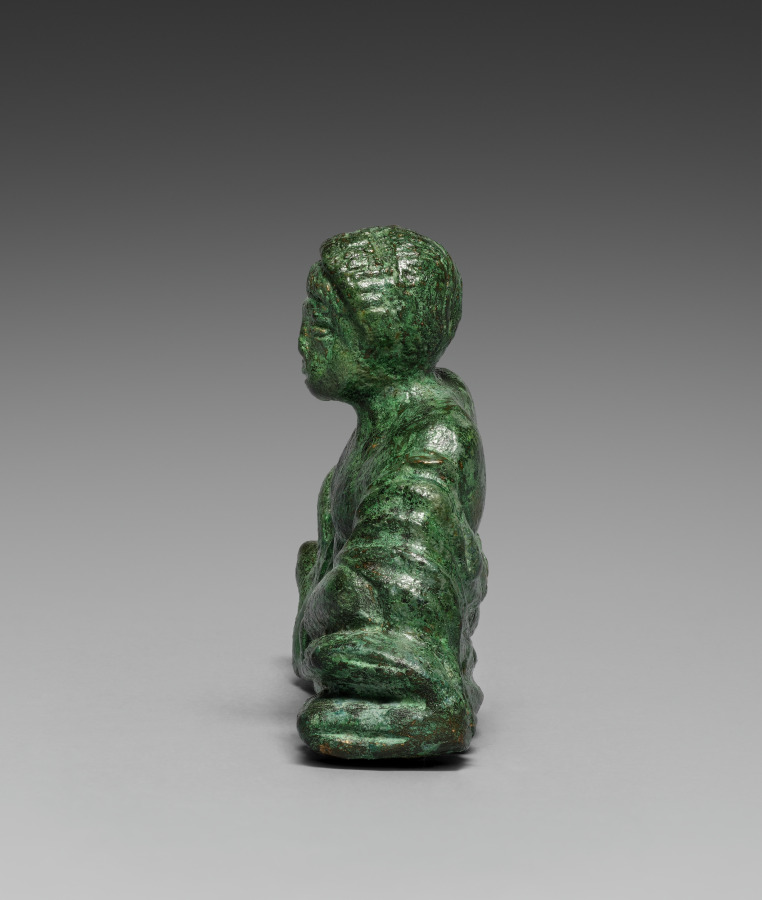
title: Vessel Ornament of Banqueter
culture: Etruscan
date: c. 400–375 BCE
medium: bronze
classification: Sculpture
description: This bronze banqueter figurine was one of six once adorning the rim of a large basin, now lost. Cast in molds with individualized details, most have grooves on their underside to attach to the basin. Minute traces of gilding remain on areas of clothing and skin (mostly visible only under magnification), suggesting that they may have been completely gilded. Two handles in the form of hippocampi, horses with serpentine tails, also belonged to the basin and are now displayed at the Michael C. Carlos Museum at Emory University. The basin may have been used to hold liquid for a banquet, or was perhaps funerary. This bronze figurine lies on his side in the posture of an ancient banqueter. His right arm is broken off but may once have rested on his hip. The figurine wears a garland on his head and a himation draped loosely around his left shoulder, revealing a muscular chest. One leg is raised over the other and a foot is exposed. Specks of gilding remain on the chest and head, but is different in color than that on the other five figurines. Also unlike the others, this one bears a visible seam across its entire length and has no groove underneath.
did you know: This reclining male banqueter demonstrates the posture of symposium guests.